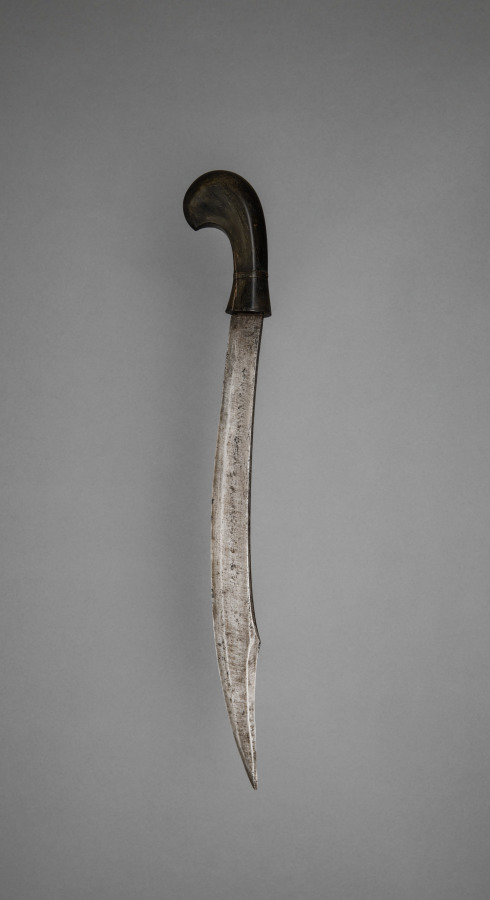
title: Dagger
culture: Indonesia, Sulawesi (Celebes)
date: before 1916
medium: metal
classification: Arms and Armor